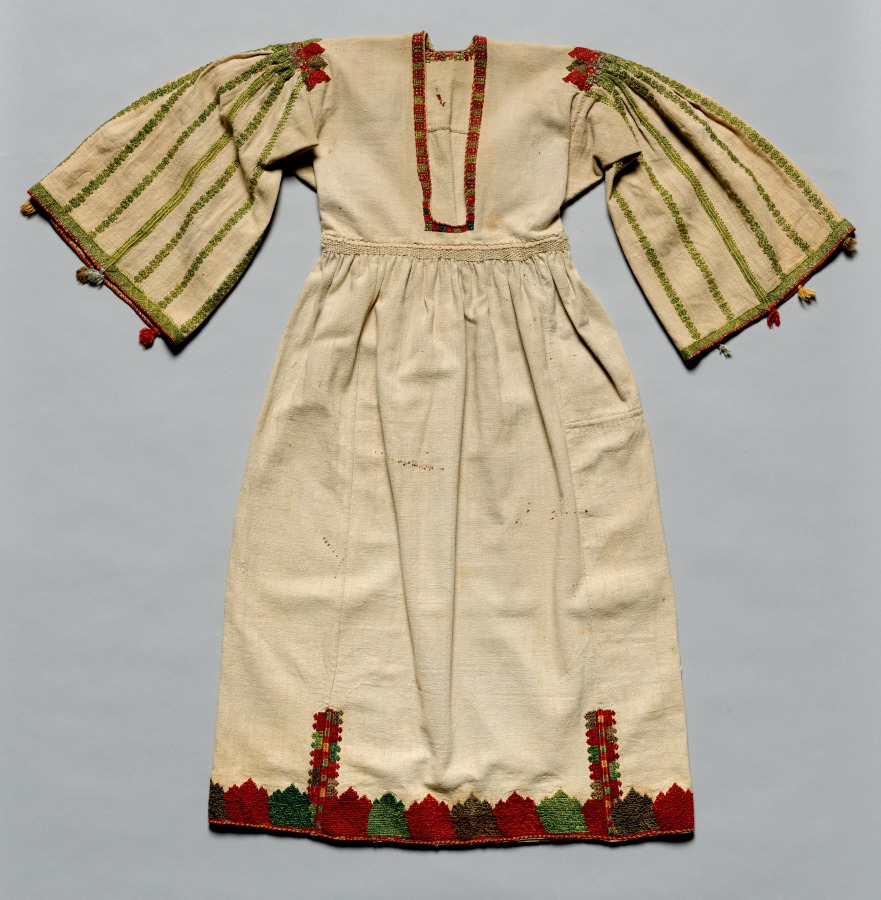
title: Woman's Dress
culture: Greece, Dodecanese Islands, Tilos ?, 18th century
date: 1700s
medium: embroidery; silk and gold filé on cotton tabby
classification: Embroidery